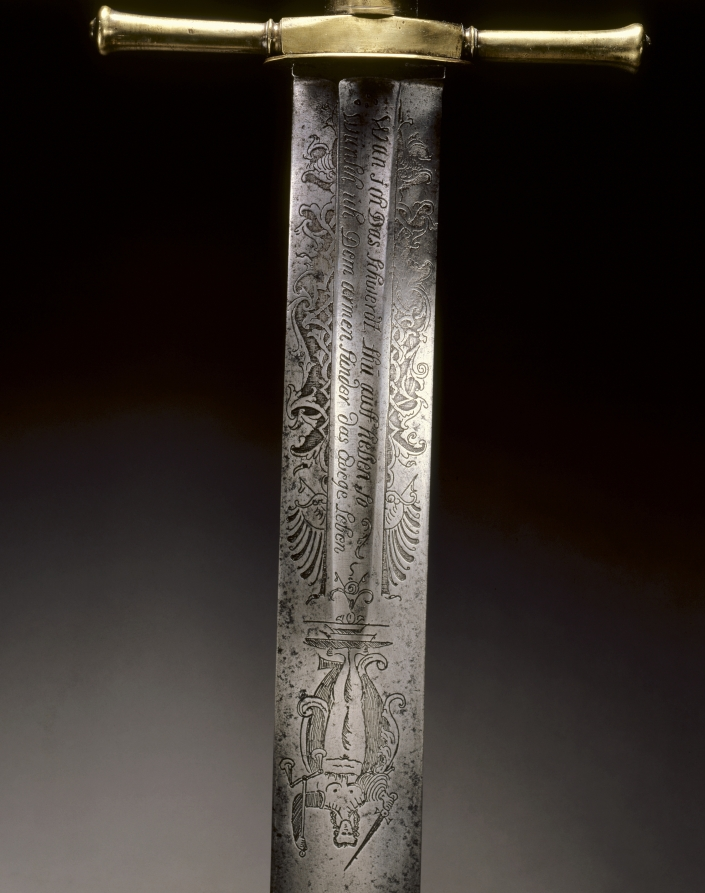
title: Executioner's Sword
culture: Germany, late 17th Century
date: late 1600s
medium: steel, wood, brass and copper wire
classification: Arms and Armor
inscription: Wan ich Das Schwerdt thu auff heben so / Wunch ich Dem armen sunder das Ewege Leben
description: Execution by decapitation was generally reserved for the nobility during the Middle Ages and Renaissance. Although the axe was favored in England, for centuries swords were used throughout Central Europe. The blades were often etched with moralizing inscriptions and designs representing Justice (as here), the gallows, the rack, or the Crucifixion. By the early 1700s swords were no longer primarily used in Europe for executions, but they still functioned as symbols of power. This sword was probably ceremonial for a formal procedure or procession.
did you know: The inscription on this sword reads, "When I raise this sword, so I wish that this poor sinner will receive eternal life."